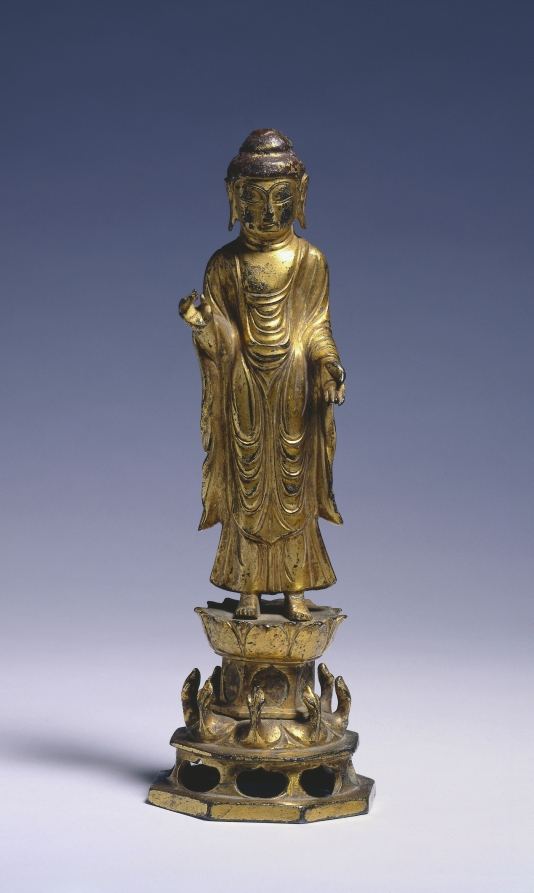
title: Statue of Amitabha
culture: Korea, Unified Silla period (676-935)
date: 800s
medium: gilt bronze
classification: Sculpture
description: This small sculpture shows Amitabha, the Buddha of the Western Paradise and the focus of the Pure Land sect of Buddhism, which was popular across East Asia, including Korea. This deity is recognizable from its right hand raised palm out in a gesture that reassures viewers to have no fear.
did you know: Small statues like this work were designed to be portable, rather than to be permanently housed in a Buddhist temple.